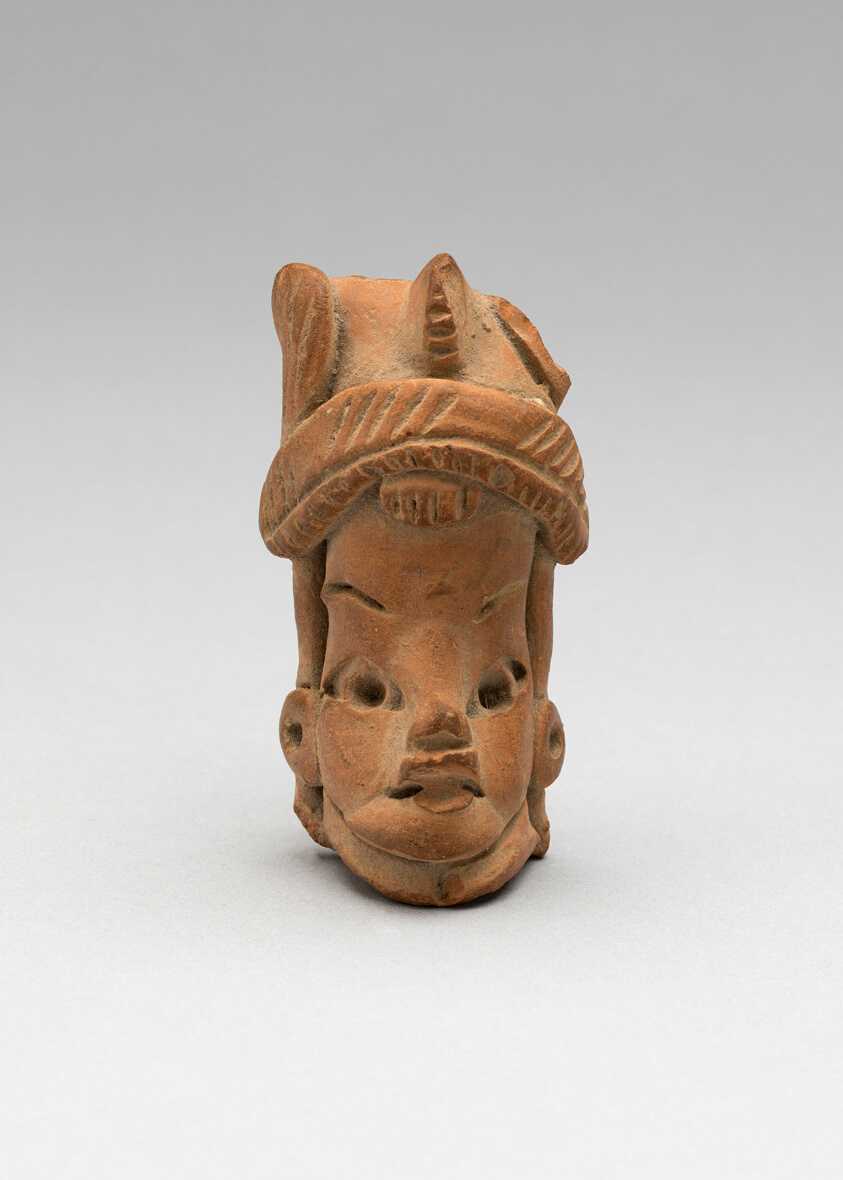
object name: Sculpture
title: Head of a Female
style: preclassic, mesoamerican, Pre-Columbian, americas, Arts of the Americas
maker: Preclassic period; Mexico or Guatemala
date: c. 600 BCE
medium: Ceramic and pigment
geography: Mexico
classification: earthenware; ceramics; sculpture; art of the americas